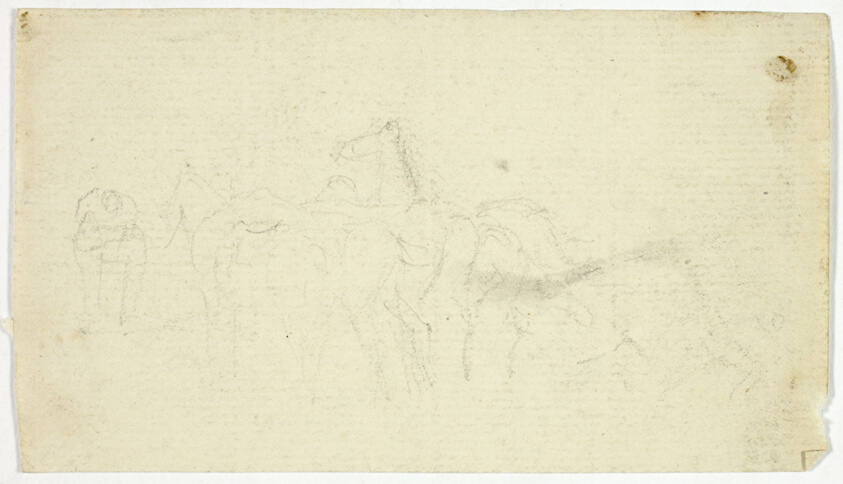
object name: Drawing and Watercolor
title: Horses with Groom (recto); Sketches of Peasant with Basket (verso)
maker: William Henry Pyne (English, 1769-1843)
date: n.d. (recto); 1789/1843 (verso)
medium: Graphite (recto and verso) on ivory laid paper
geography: England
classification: graphite; drawings (visual works); prints and drawing